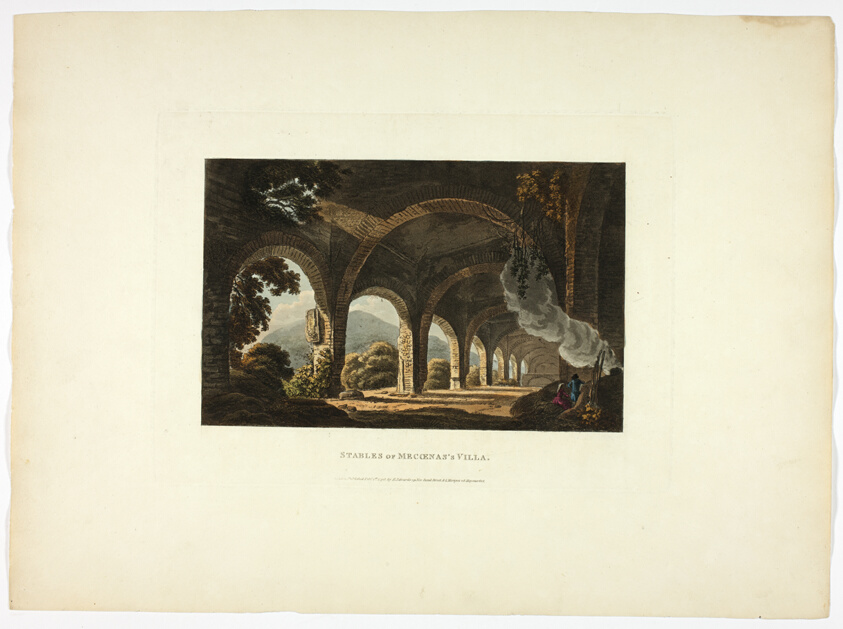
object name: Print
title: Stables of Meccena's Villa, plate eleven from the Ruins of Rome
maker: M. Dubourg, (English, active 1786-1838); published by J. Merigot (Italian, Unknown)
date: published February 1, 1798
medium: Hand-colored aquatint on paper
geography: England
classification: aquatint; print; prints and drawing